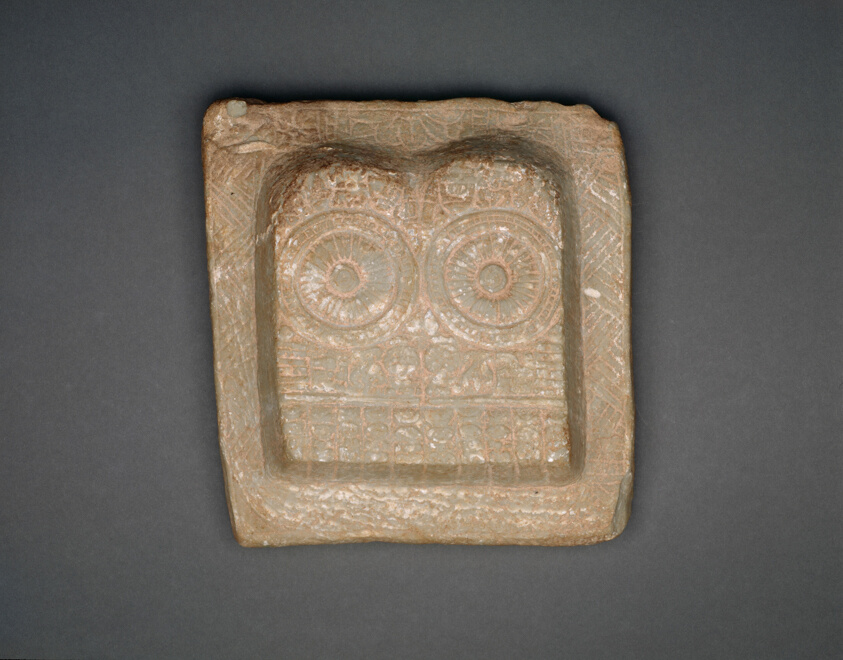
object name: Religious/Ritual Object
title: Buddha's Footprints (Buddhapada)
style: South Asian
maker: India; Andhra Pradesh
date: c. 2nd/3rd century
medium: Limestone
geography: Andhra Pradesh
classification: stone (unidentified); stone; sculpture; asian art; ritual objects